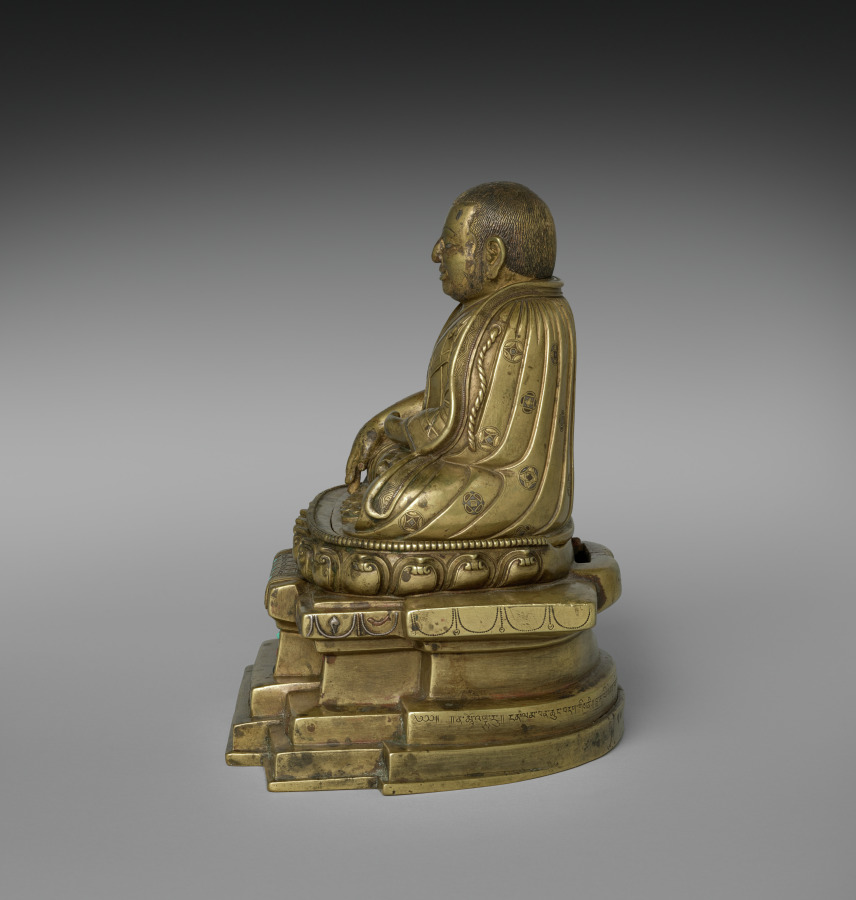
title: Portrait of Phagmo Drupa Dorje Gyalpo (1110–1170)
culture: Central Tibet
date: 1200s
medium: gilt bronze with gold, silver, copper, turquoise, lapis, and coral inlay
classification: Sculpture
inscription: / / Na mo 'ghu ru / / Ngan lam ban chung bdag gis ni / / bla ma Rin chen sku bzhengs pa yi / / bsod nams 'di yi byin brlabs kyis / / 'gro drug sdug sngal zad par shog / / Translation: "Salutations to the master ! May the sufferings of the six kinds of beings be appeased through the blessing of merit gained by me, the little monk of Ngan.lam, in having this statue of the Lama Rin.chen made."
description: This portrait statue depicts the first monastic leader of the prominent Buddhist monastery of Densatil, an influential early leader of the Tibetan Buddhist monastic order called Kagyu, famous for his views on the importance of meditation. He sits on a lotus pedestal and lion throne, like a Buddha, and his hand positions (mudras) communicate that meditation leads to enlightenment.